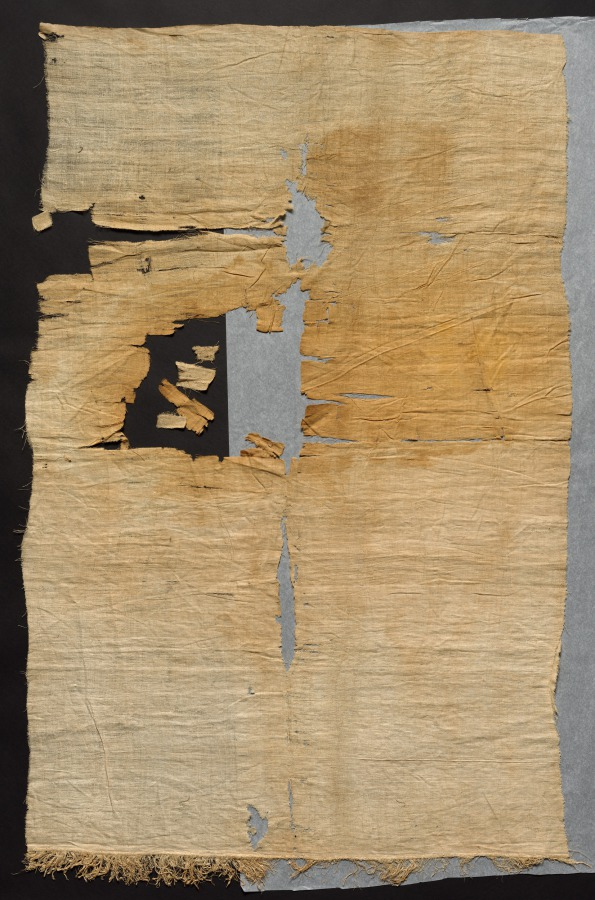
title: Mummy Linen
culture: Egypt, New Kingdom (1540–1069 BCE), Dynasty 18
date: 1550–1291 BCE?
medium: plain weave: linen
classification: Textile